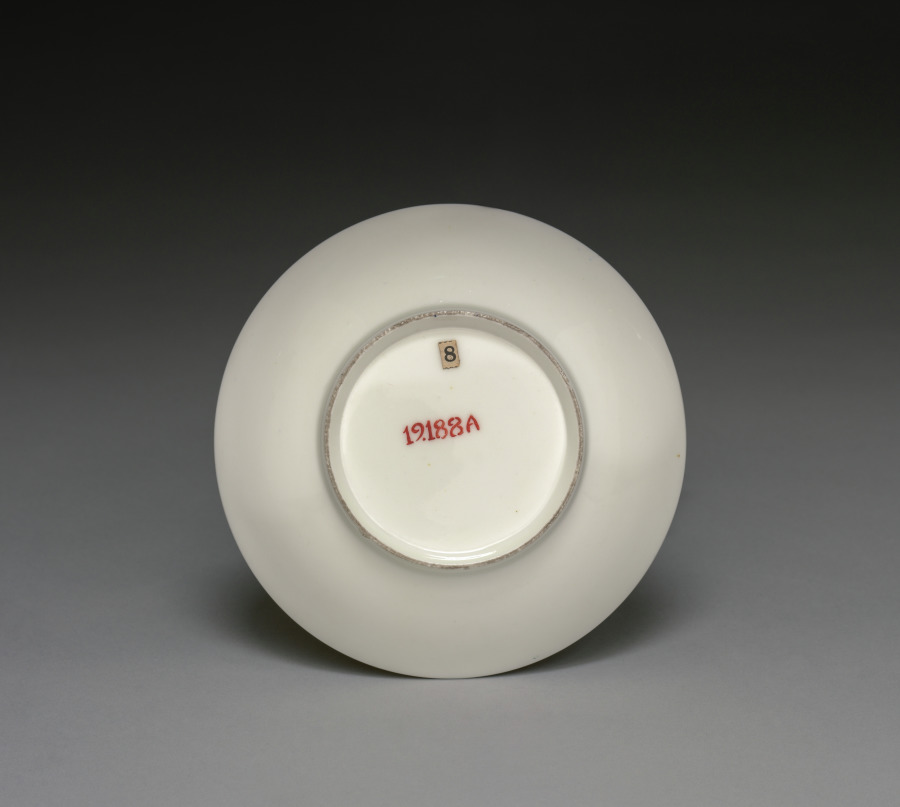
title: Saucer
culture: England, Staffordshire, late 18th century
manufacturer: Spode Factory (British)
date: late 1700s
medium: porcelain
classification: Ceramic